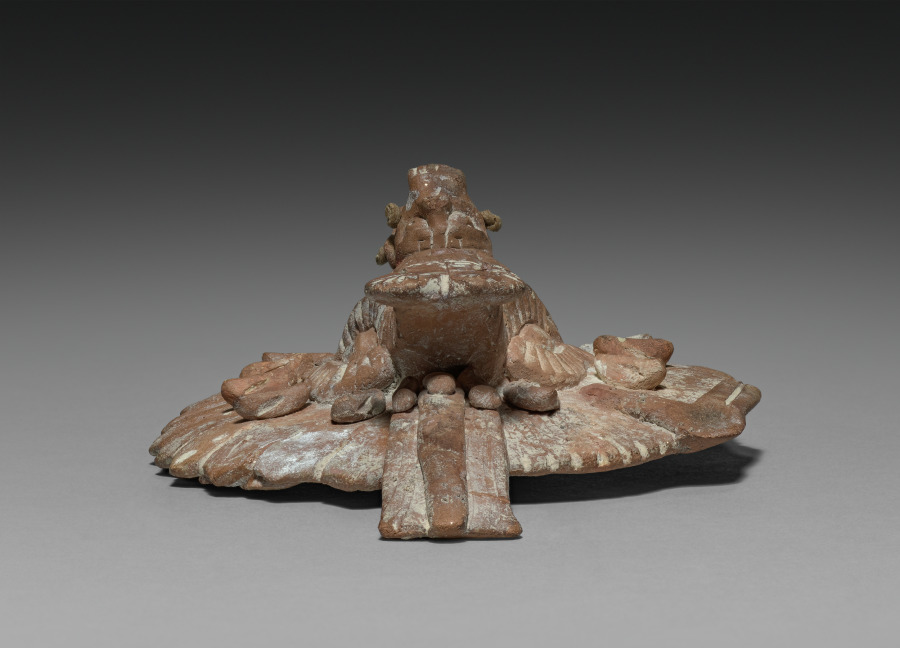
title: Seated Lord with Removable Headdress: Headdress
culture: Mesoamerica, Maya, probably Jaina Island, Late Classical period, 7th-9th century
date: 600–800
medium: ceramic and slip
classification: Ceramic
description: The major Maya grave offerings on Jaina Island were ceramic figurines that depict deities and humans in a variety of roles. The headdress belongs to a seated figure who represents a male, perhaps another warrior, who wears a huge zoomorphic headdress. A skeletal face with articulated jaw descends from the headdress to fit as a mask over the figure’s face.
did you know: It is estimated that some 20,000 people were buried on the tiny island of Jaina over a 500-year period.